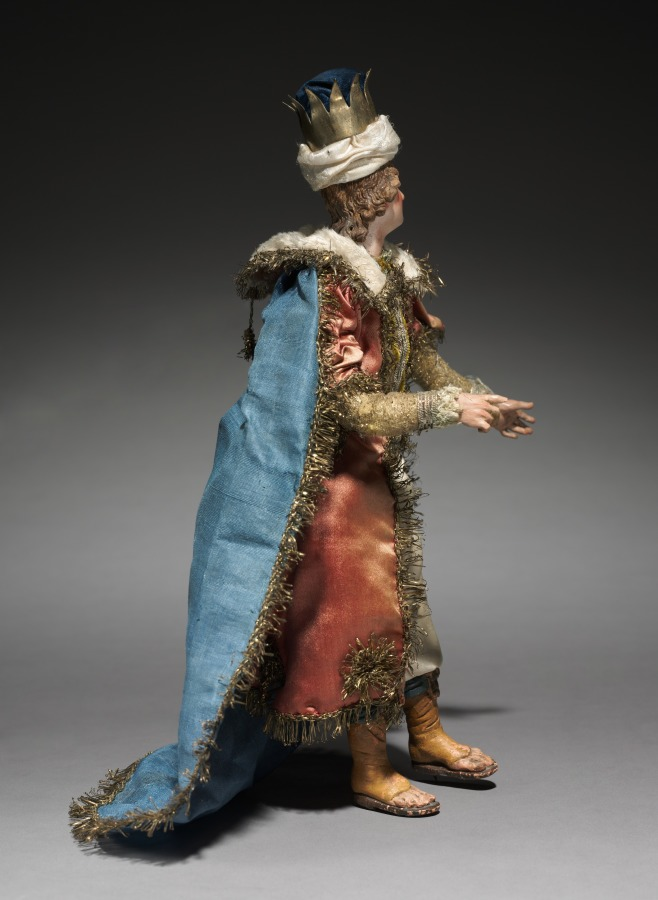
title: Figure from a Crèche: Youthful Magus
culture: Italy, Naples, late 18th-early 19th century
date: 1780–1830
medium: painted wood and terracotta with various textiles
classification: Sculpture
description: The practice of creating scenes of the Nativity for the home dates from the early 1700s in Italy, where people began to set up doll-like figures of about a foot or less in height. The custom was particularly popular in Naples around 1800, where crèche scenes (crèche means cradle, or crib) included many figures, whose heads and hands of painted terracotta, stuffed cloth bodies, and clothing adapted from contemporary local costumes gave them an amazingly realistic character. Representations of the birth of Jesus can be traced to the first few centuries of Christianity. Both living creatures and sculptural depictions of them were used from early times. By the late middle ages it was customary to create life-size figures of wood or stone, naturalistically painted, to represent the characters who participated in the events of Jesus's early life. These sculptures were then arranged in scenes illustrating one or both of the most important of these events, the Adoration of the Shepherds and the Adoration of the Magi-the three kings from the East who came to pay homage to the Christ child. Used in churches, these large figures were especially popular in Italy, Central Europe, Spain, and Portugal.